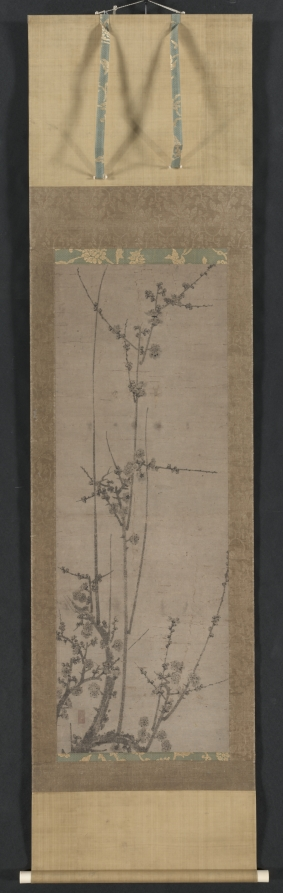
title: Plum Blossoms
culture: Japan, Nanbokuchō period (1336–92)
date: 1336–92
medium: hanging scroll; ink on paper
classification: Painting